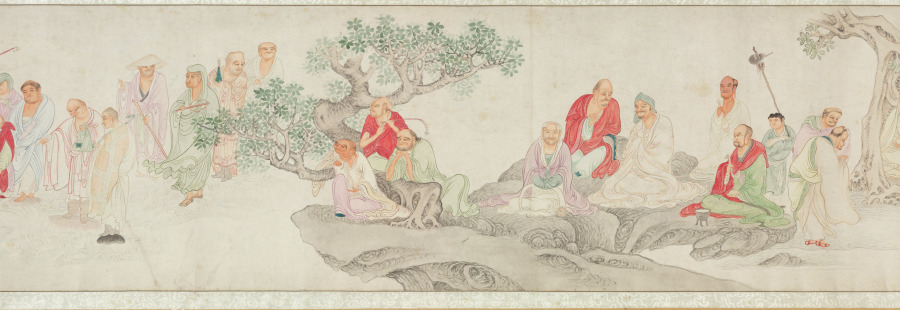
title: The Five Hundred Arhats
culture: China, Ming dynasty (1368–1644)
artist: Wu Bin (Chinese, active c. 1591–1626)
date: 1591–1626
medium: Handscroll; ink and color on paper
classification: Painting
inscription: 枝隱頭陀吳彬齋心拜寫 [印]吳彬之印; 文中父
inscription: 7 seals of Qianlong emperor (r. 1736–95): Gu xi tian zi 古希天子; Shou 壽; Qianlong jian shang 乾隆鑑賞; San xi tang jing jian xi 三希堂精鑑璽; Yi zi sun 宜子孫; Tai shang huang di zhi bao 太上皇帝之寳; Qian qing gong bao 乾清宮寶.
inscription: 6 seals of Cheng Qi 程琦 (1911–1988): Ke an geng zi wu shi yi hou suo de ming ji 可菴庚子五十以後所得名跡; 5 other Cheng Qi seals.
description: More than 66 feet long, this handscroll depicts 447 luohans, 72 attendants, and the bodhisattva of compassion at its very end. Luohans (arhats in Sanskrit), disciples of the Buddha and protectors of the Buddha’s law, possess supernatural powers and take on myriad external appearances. The amusing assortment of characters are engaged in an array of religious, secular, and miraculous activities. The painter used stylistic features borrowed from earlier artists, carefully controlled lines, and refined coloring. Wu Bin was a lay Buddhist and depicting this sort of image was part of a religious practice seeking understanding of the Buddha’s teaching.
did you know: Far advanced on the path to enlightenment, arhats have the capacity to tame tigers, free dragons, and to float on water or in the air.